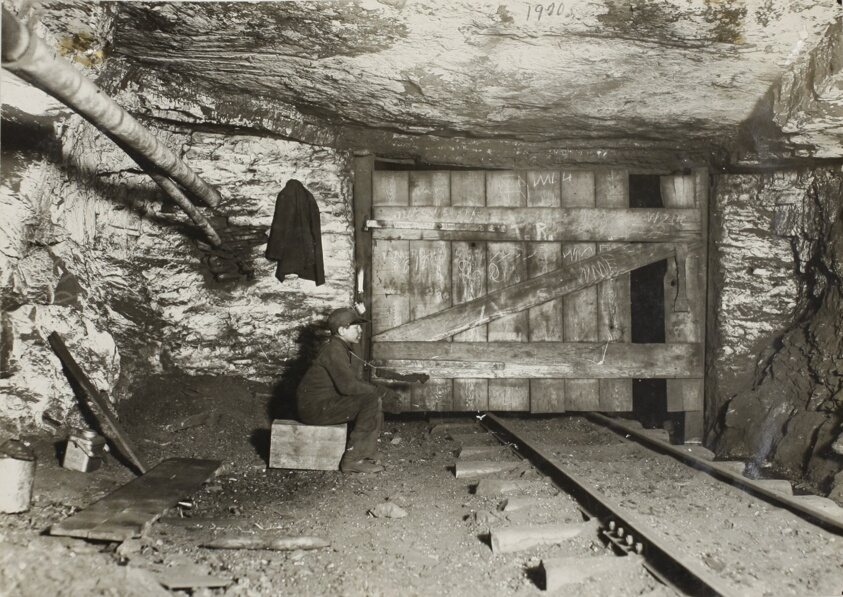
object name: Photograph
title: Boy Waiting for Coal to Come Thru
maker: Lewis Wickes Hine (American, 1874–1940)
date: 1911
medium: Gelatin silver print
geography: United States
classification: photograph; photography